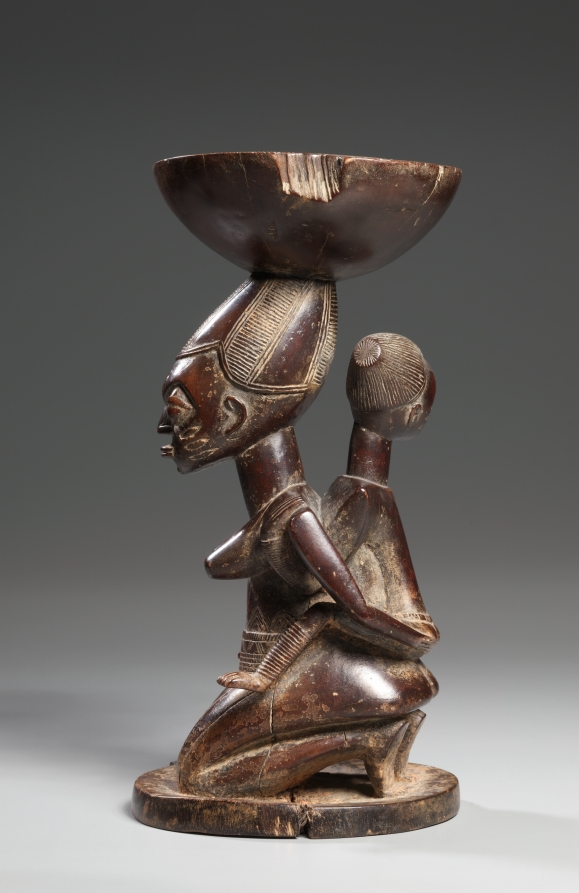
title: Ifá divination vessel (àgéré Ifá)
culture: Africa, West Africa, Nigeria, possibly Èkìtì State, Yorùbá-style carver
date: mid- late 1800s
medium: Wood and colorant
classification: Sculpture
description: The mother figure of this vessel from the Southern Ekiti region represents a devotee who kneels before the gods. The vessel once held the 16 sacred palm nuts essential to divination rituals. The object was used by a priest as a medium through which to communicate with the god of fate, Orunmila, in order to gain insight into an individual’s destiny or to understand the cause of misfortune.